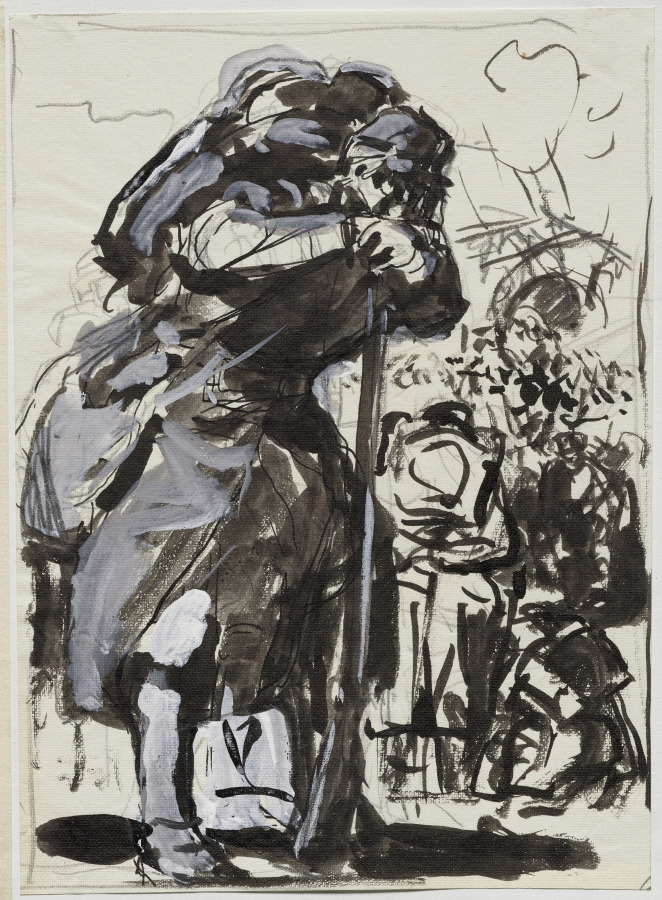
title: La Retraite après Charleroi...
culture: France, 20th century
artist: Auguste Louis Lepère (French, 1849–1918)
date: 1914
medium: pencil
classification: Drawing